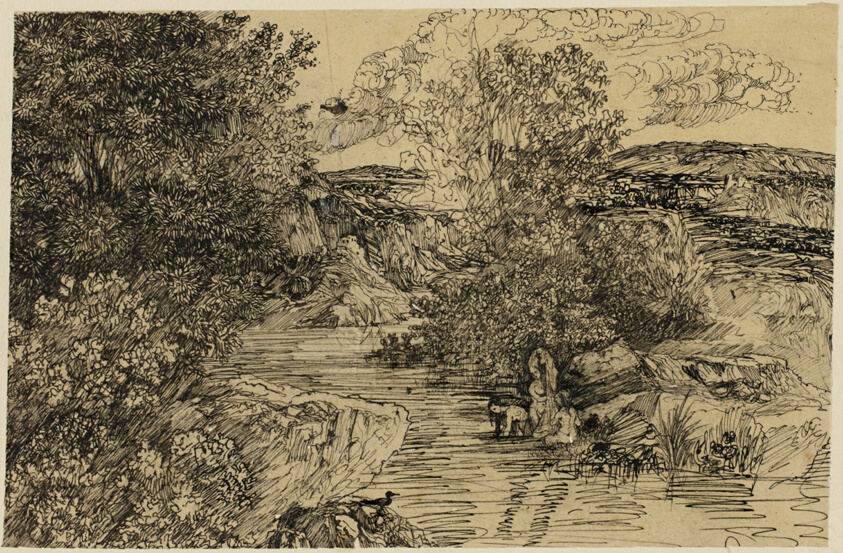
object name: Drawing and Watercolor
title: Bathers in a Brook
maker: Rodolphe Bresdin (French, 1825-1885)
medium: Pen and black ink over graphite, on tan tracing paper, laid down on buff wove paper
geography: France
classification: pen and ink drawings; drawings (visual works); prints and drawing